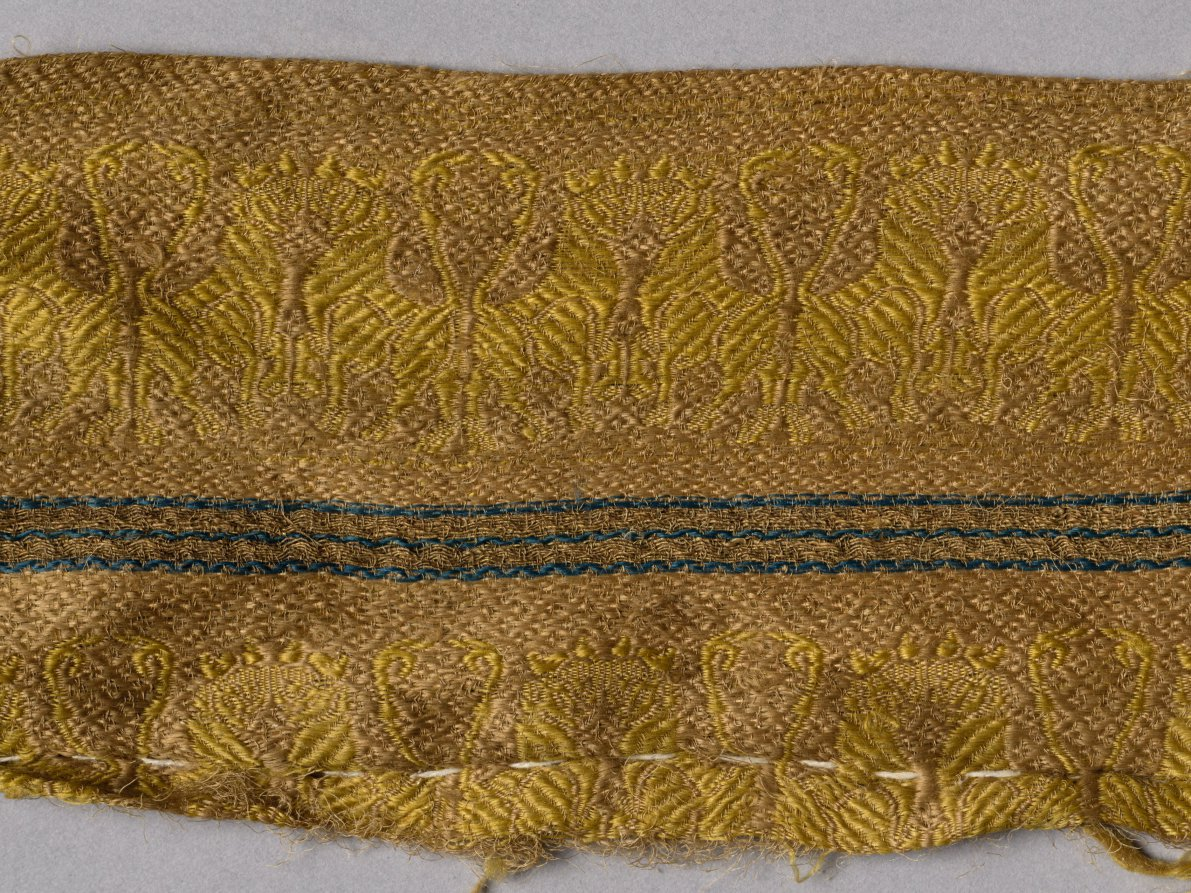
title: Reliquary bag with lions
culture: Spain, probably Almeria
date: late 1100s-1300s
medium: cloth d’areste, weft-faced lozenge twill variant: silk and gold thread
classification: Textile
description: This bag was originally inside of the portable altar commissioned by Countess Gertrude of Brunswick, one of the Guelph Treasure’s earliest and most sumptuous objects.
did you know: This silk bag originally held bits of mummified flesh or tissue which was labeled as being from Saint Bartholomew.